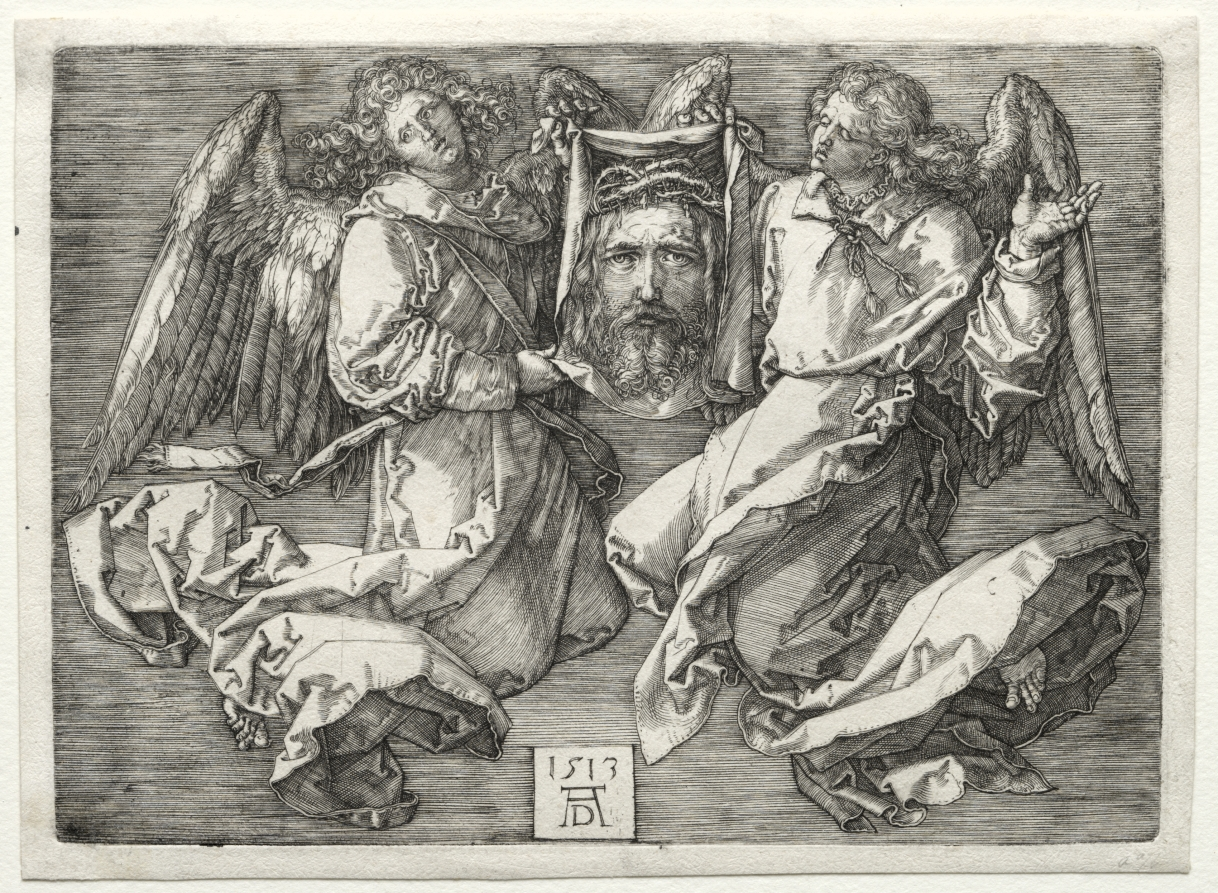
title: Sudarium Displayed by Two Angels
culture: Germany, late 15th-early 16th century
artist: Albrecht Dürer (German, 1471–1528)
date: 1513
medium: engraving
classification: Print